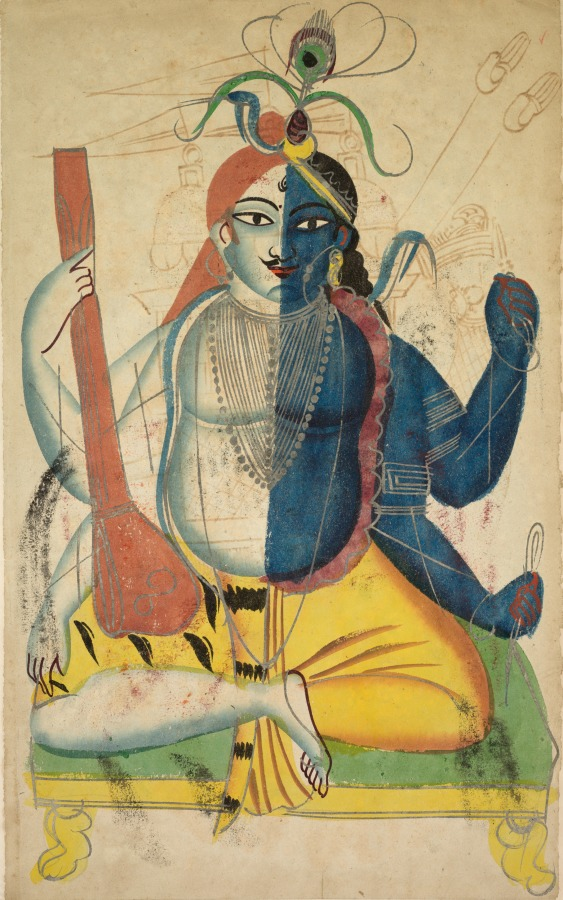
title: Hari-Hara (recto), from a Kalighat album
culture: Eastern India, Bengal, Kolkata, Kalighat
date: c. 1890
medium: Gum tempera, graphite, ink, and tin on paper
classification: Painting